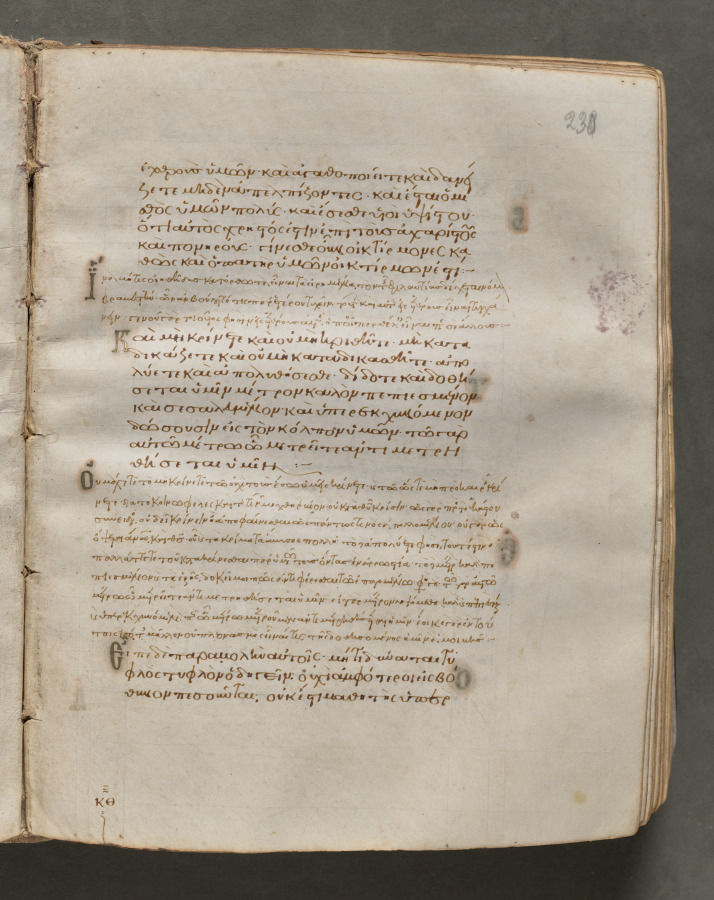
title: Text, folio 230 (recto), from a Gospel Book with Commentaries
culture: Byzantium, Constantinople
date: c. 1000–1100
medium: ink, tempera, and gold on vellum; leather binding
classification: Bound Volume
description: Each of the four gospels in this book opens on a page with brilliantly illuminated borders depicting the author of the text as well as birds—principally peacocks, symbols of the immortality of the soul—and fountains, representing the fountain of life and the salvation of the soul. This volume consists of 428 leaves with texts in Greek. Its level of sophistication suggests that it was probably written and decorated in a monastery in Constantinople.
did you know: Gospel books were carried in procession through Byzantine churches.